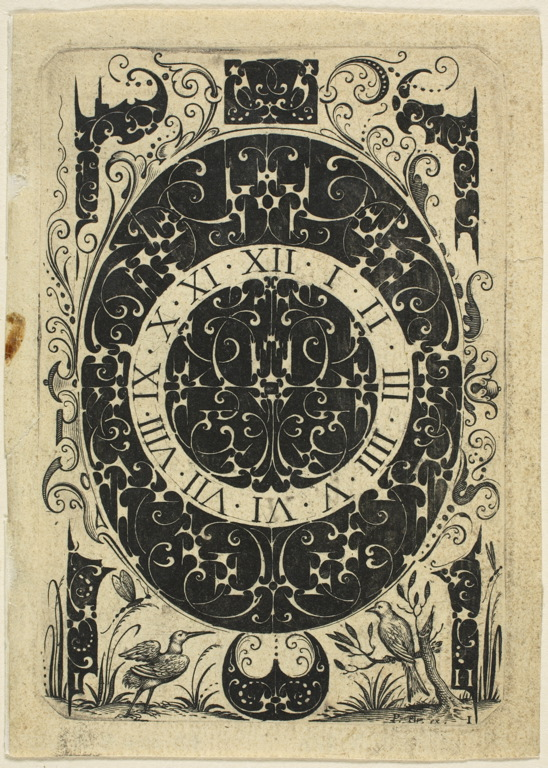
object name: Print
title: Ornamental Plate I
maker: Jacques Hurtu (French, flourished 1614-19-died before 1623)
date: 1610/20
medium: Engraving on paper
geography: France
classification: engraving; print; prints and drawing